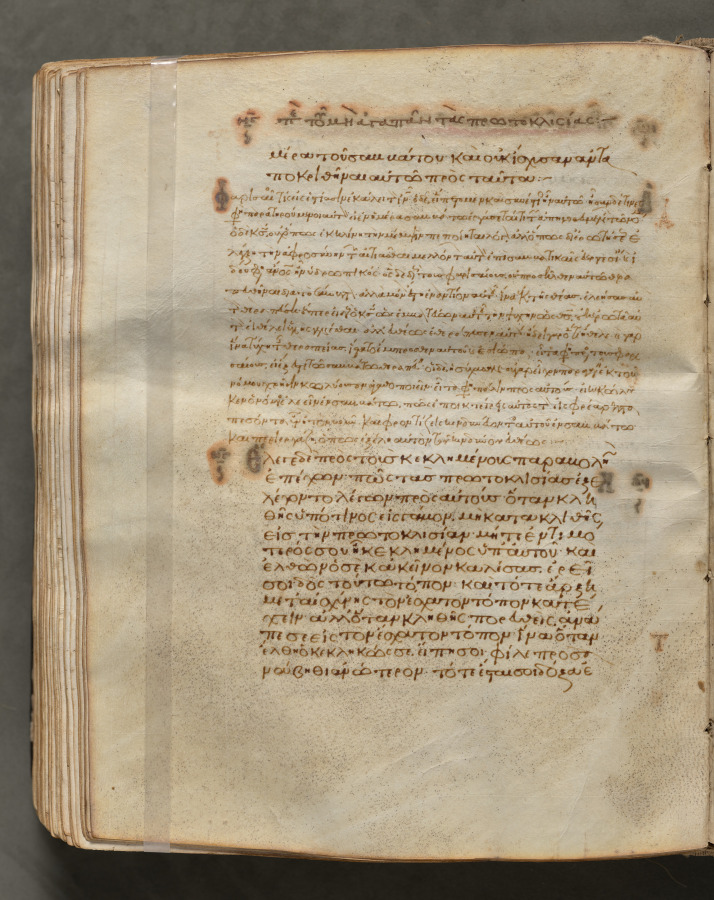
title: Text, folio 276 (verso), from a Gospel Book with Commentaries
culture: Byzantium, Constantinople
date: c. 1000–1100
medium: ink, tempera, and gold on vellum; leather binding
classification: Bound Volume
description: Each of the four gospels in this book opens on a page with brilliantly illuminated borders depicting the author of the text as well as birds—principally peacocks, symbols of the immortality of the soul—and fountains, representing the fountain of life and the salvation of the soul. This volume consists of 428 leaves with texts in Greek. Its level of sophistication suggests that it was probably written and decorated in a monastery in Constantinople.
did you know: Gospel books were carried in procession through Byzantine churches.